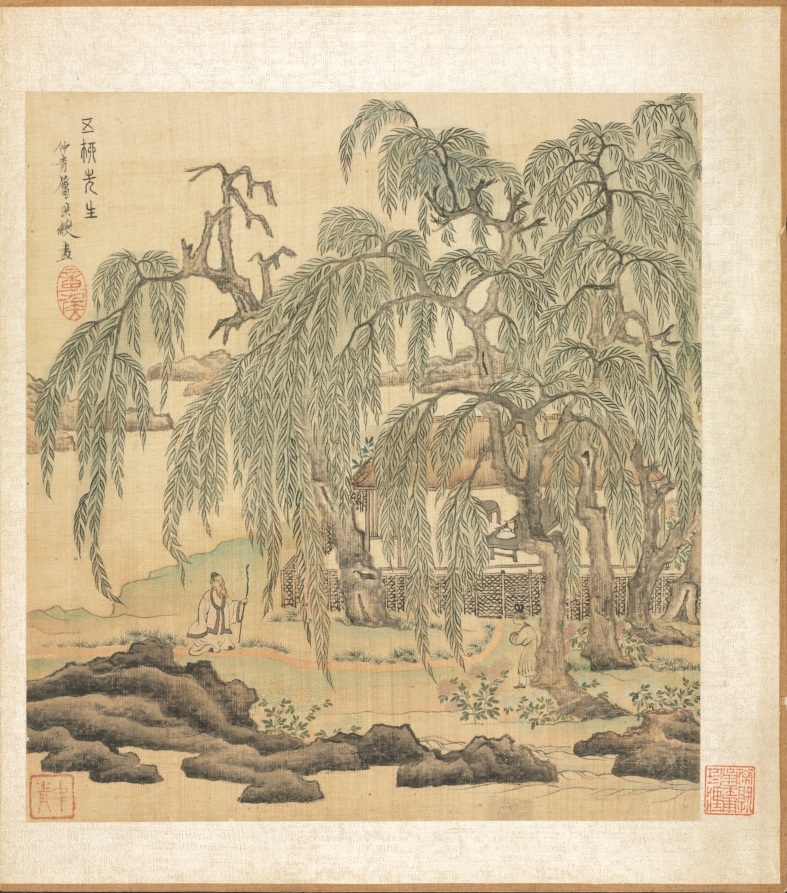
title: Paintings after Ancient Masters: Mr. Five Willows (Wuliu), Tao Yuanming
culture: China, Ming dynasty (1368–1644)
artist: Chen Hongshou (Chinese, 1598/99–1652)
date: 1598–1652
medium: album leaf, ink and color on silk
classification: Painting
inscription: 五柳先生仲青屬洪綬畫. [印] 章侯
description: The twenty paintings in this double-album by Chen Hongshou include landscapes, figures, and flowers. It also has one leaf featuring a woman, an often-used subject not found in the other albums from the latter part of his career. His late works are wonderful summations of Chen's peculiar and quirky art--archaistic, hyper-refined--but without accompanying shallowness or sentimentality. His figures and landscapes in the late albums are miniaturized, not unlike the small Chinese gardens, or the carefully selected small table rocks or old roots used for contemplation to see the world in miniature. This loss of scale is quite deliberate and reflects the psychological situation of a depressed class like the Ming loyalist officials and scholars, deprived of their integrity and honor, and forced to lead a diminished and restricted existence.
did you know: This painting is dominated by a huge willow tree, alluding to poet Tao Yuanming, who used the name "Master of the Five Willows."